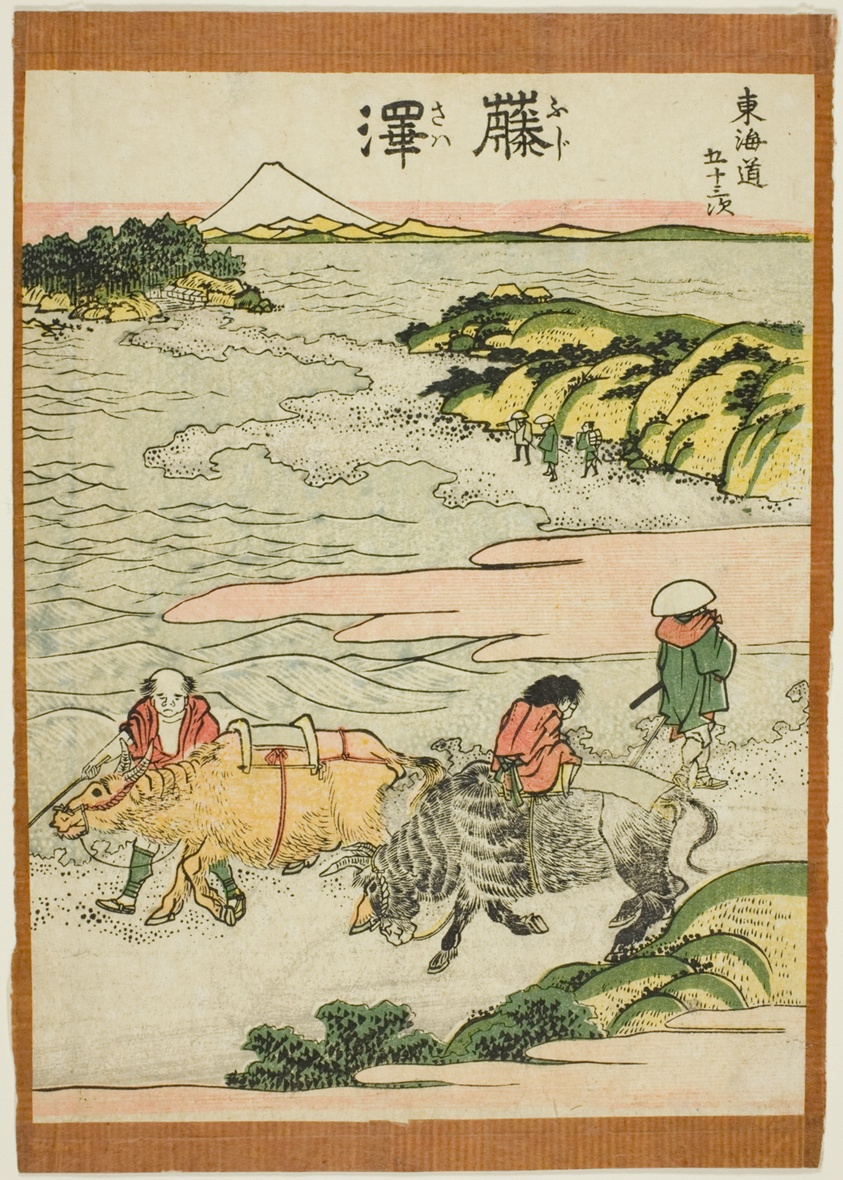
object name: Print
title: Fujisawa, from the series "Fifty-three Stations of the Tokaido (Tokaido gojusan tsugi)"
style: Japanese (culture or style)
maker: Katsushika Hokusai 葛飾 北斎; Japanese, 1760-1849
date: c. 1806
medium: Color woodblock print; chuban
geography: Japan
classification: woodblock print; print; asian art